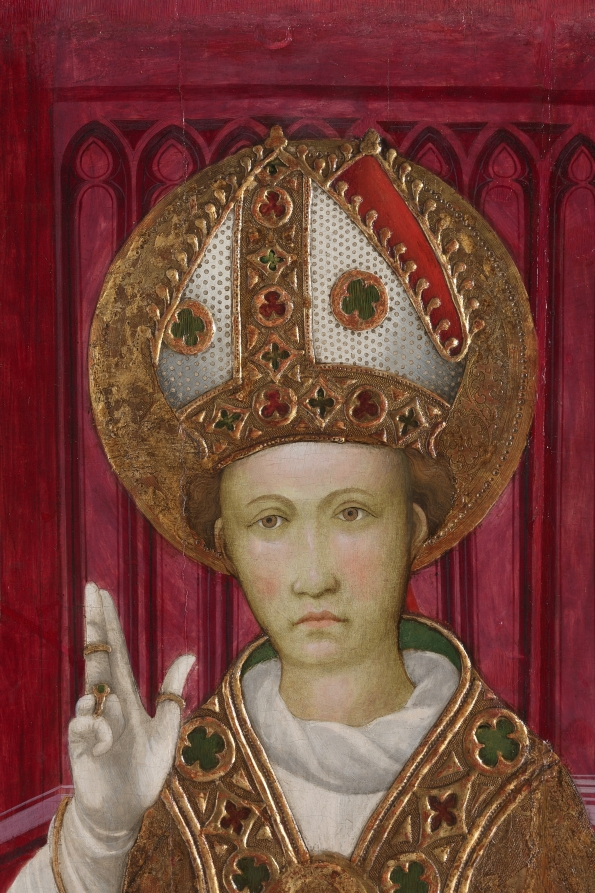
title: A Bishop Saint with a Donor (Saint Louis of Toulouse?)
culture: Spain, Catalonia, early 15th century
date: early 1400s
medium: tempera with raised and gilded gesso on wood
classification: Painting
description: The style of this painting suggests that it comes from Catalonia in northeastern Spain, though the identity of its artist remains unknown. The painting represents a youthful bishop-saint identifiable by a bishop’s symbols of authority, his miter and crozier. He wears rich vestments. Below, the figure in black represents the donor of the painting—likely a wealthy layperson rather than a cleric. The identity of the saintly bishop is speculated to be Saint Louis, Bishop of Toulouse, on the basis of his youth. Louis was consecrated Bishop of Toulouse in 1297, died six months later at the age of 23, and was canonized in 1317. His relics were moved in 1423 to Valencia and his cult flourished in Spain.